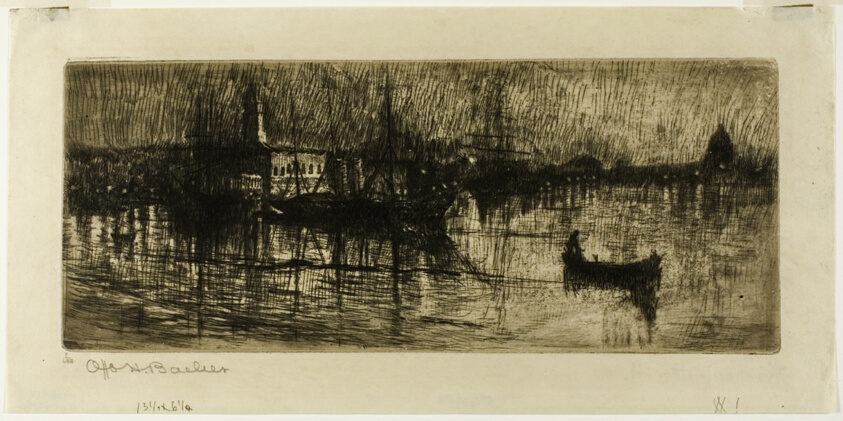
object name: Print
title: Rainy Night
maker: Otto Henry Bacher (American, 1856-1909)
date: 1880/ 1882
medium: Etching on cream China paper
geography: United States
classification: etching; print; prints and drawing